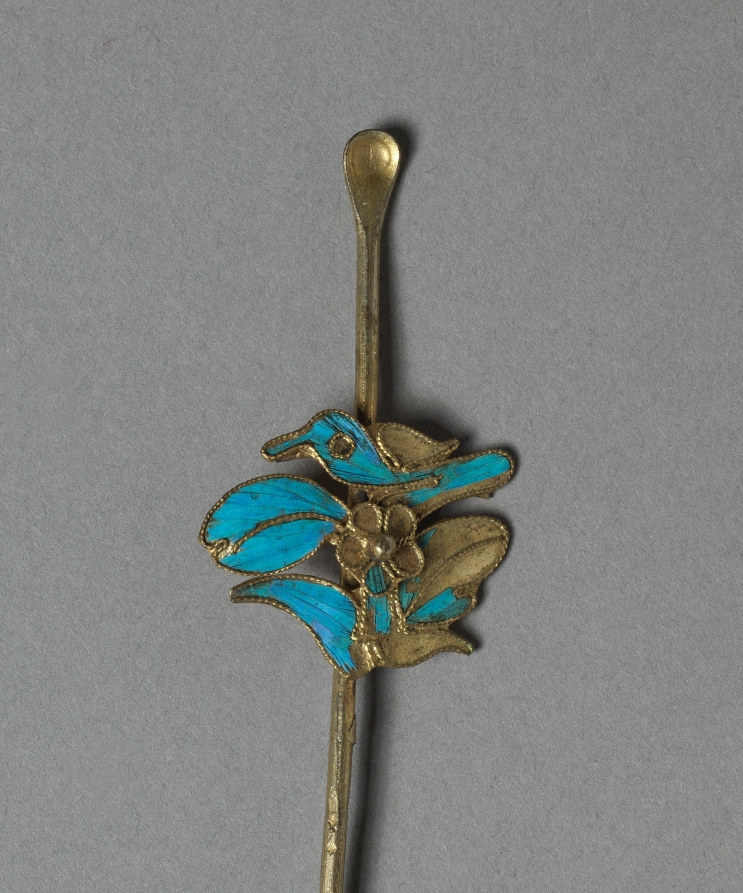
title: Headdress Ornament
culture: China, Qing dynasty (1644-1911)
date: 1700s or 1800s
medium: Copper-silver alloy, gilding, kingfisher feathers, glass beads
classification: Jewelry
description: Hair ornaments depicting flowers, butterflies, or birds were worn by ladies of the Manchu elite class.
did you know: The iridescent blue feathers of kingfisher birds are inlaid in hairpins and headdresses.